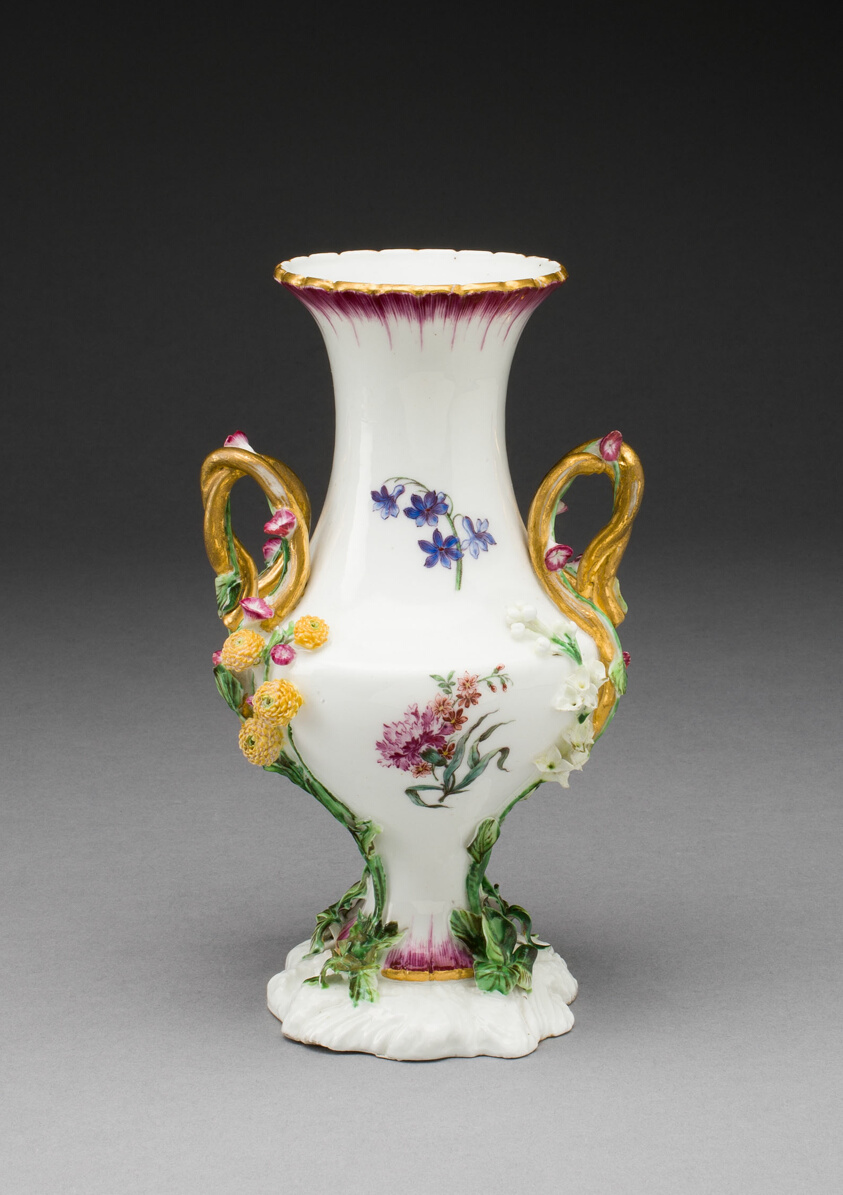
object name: Ceramics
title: Vase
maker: Designed by Jean-Claude Duplessis (French, c. 1695–1774); Vincennes Porcelain Manufactory (French, 1740–1756, after became Sèvres Porcelain Manufactory)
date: c. 1749–52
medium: Soft-paste porcelain, polychrome enamels, and gilding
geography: Vincennes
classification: vase; vessel; porcelain; european decorative arts; ceramics